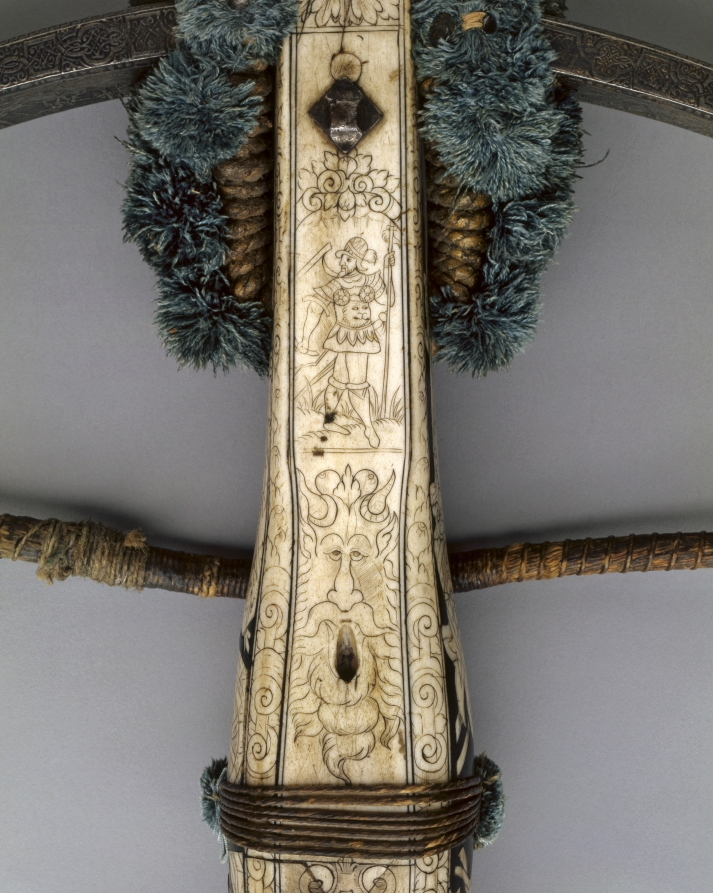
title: Crossbow of Elector Augustus I of Saxony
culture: Germany, Saxony, 16th century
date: c. 1553–73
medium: wood (walnut?), bone veneers, flax cord, steel (etched, traces of gilding). woolen pompoms, stock decorated wih inlaid trophies of arms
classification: Arms and Armor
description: This crossbow was a hunting weapon for Prince Elector Augustus I, a member of the ruling elite in the Holy Roman Empire. Augustus, powerful and wealthy, had even the most practical instruments ornately decorated, including this crossbow and its cranequin, or winding device.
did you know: Augustus was a marksman who took part in crossbow competitions. He had a large collection and often gave them to friends.